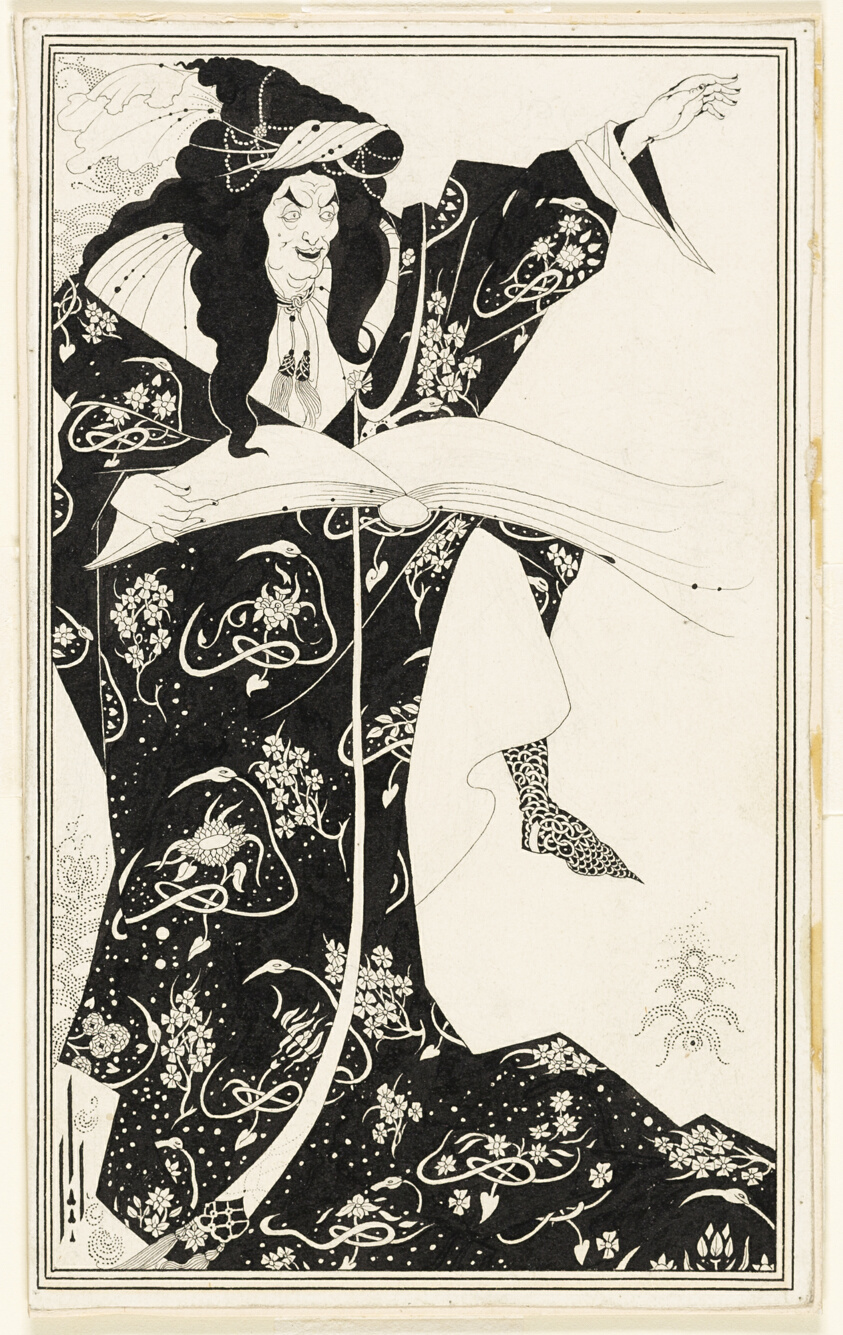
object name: Drawing and Watercolor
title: Virgilius the Sorcerer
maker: Aubrey Vincent Beardsley (English, 1872-1898)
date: c. 1893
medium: Pen and brush and black ink, over traces of graphite, on ivory wove paper, laid down on board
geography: England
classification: pen and ink drawings; drawings (visual works); prints and drawing